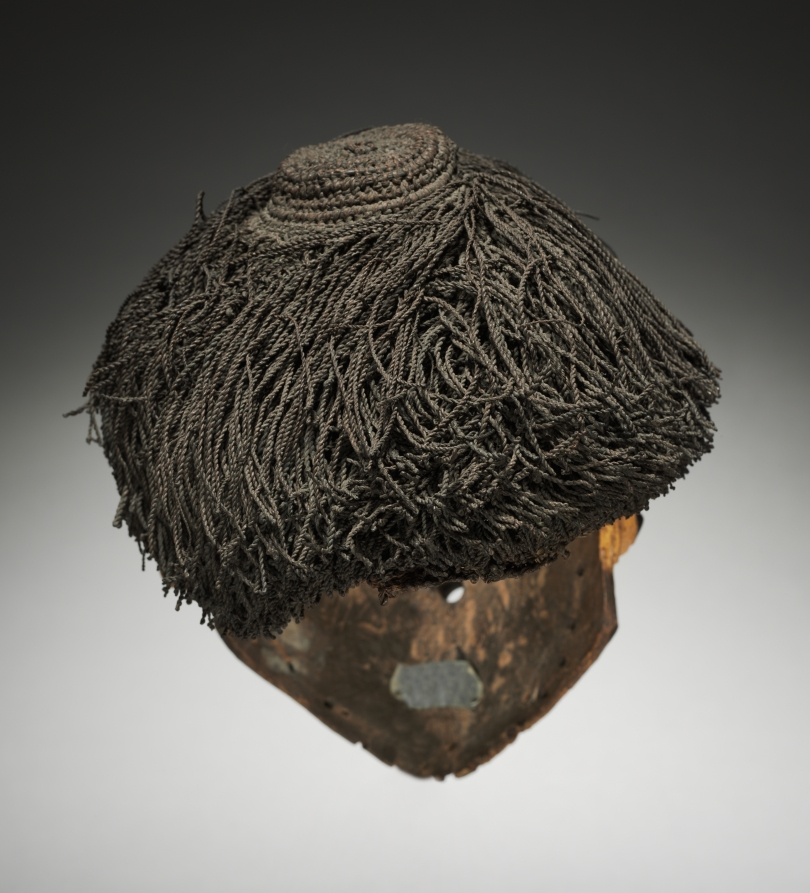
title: Female Mask (Gambanda or Kambanda)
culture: Africa, Central Africa, Democratic Republic of Congo, Pende-style maker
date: early 1900s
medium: Wood, plant fiber, and colorant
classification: Mask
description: Realized in typical Central Pende style, this mask is believed to represent gambanda, the chief's wife. In light of Pende theories about gender and physiognomy, the mask is an ideal expression of a woman's facial features and thus reflects her calm, obedient, peaceful, and self-controlled demeanor. The intricate hairstyle consisting of hundreds of miniature twists imitates a once fashionable hairdo. Pende sculptors inherited their position and often worked on the outskirts of the village so that few could see them at work.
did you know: This female mask would have performed in a collective multimedia event with audience participation.